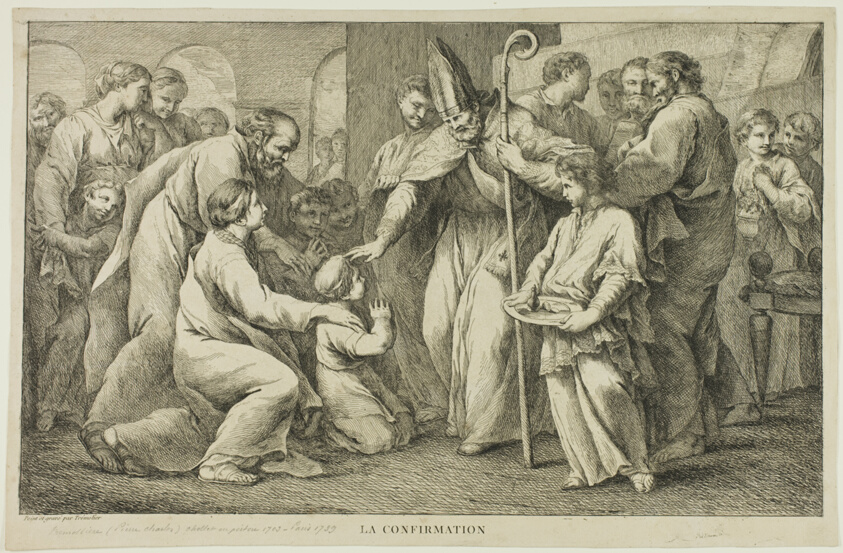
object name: Print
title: The Confirmation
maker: Pierre Charles Trémolières (French, 1703-1739)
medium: Etching in black on cream laid paper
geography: France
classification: etching; paper; print; prints and drawing